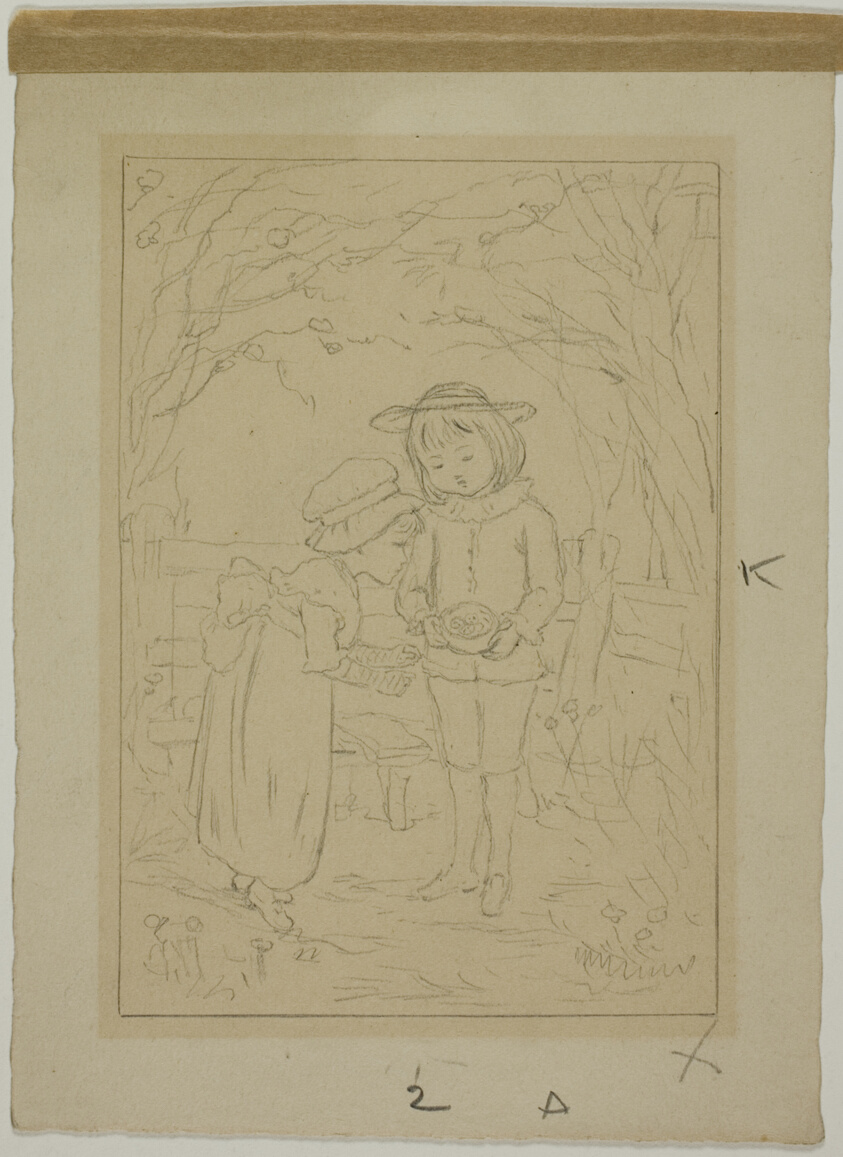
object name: Drawing and Watercolor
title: Discovery of Bird's Nest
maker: Kate Greenaway (English, 1846-1901)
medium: Graphite on cream wove paper (discolored to tan)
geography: England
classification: graphite; drawings (visual works); prints and drawing